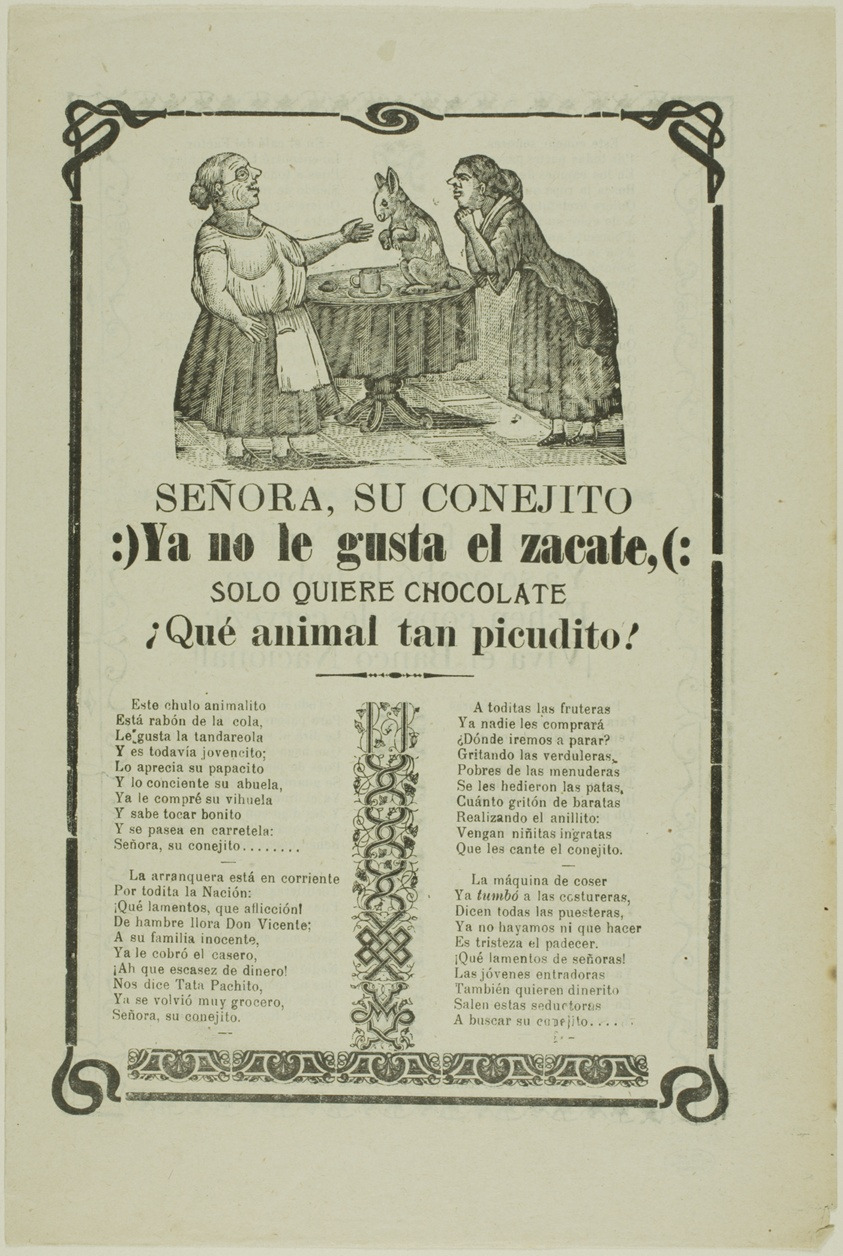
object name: Print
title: Madame, Your Little Rabbit...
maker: Attributed to Manuel Manilla; Mexican, 1830-c. 1900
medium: Relief print on paper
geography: Mexico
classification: relief etching; print; prints and drawing